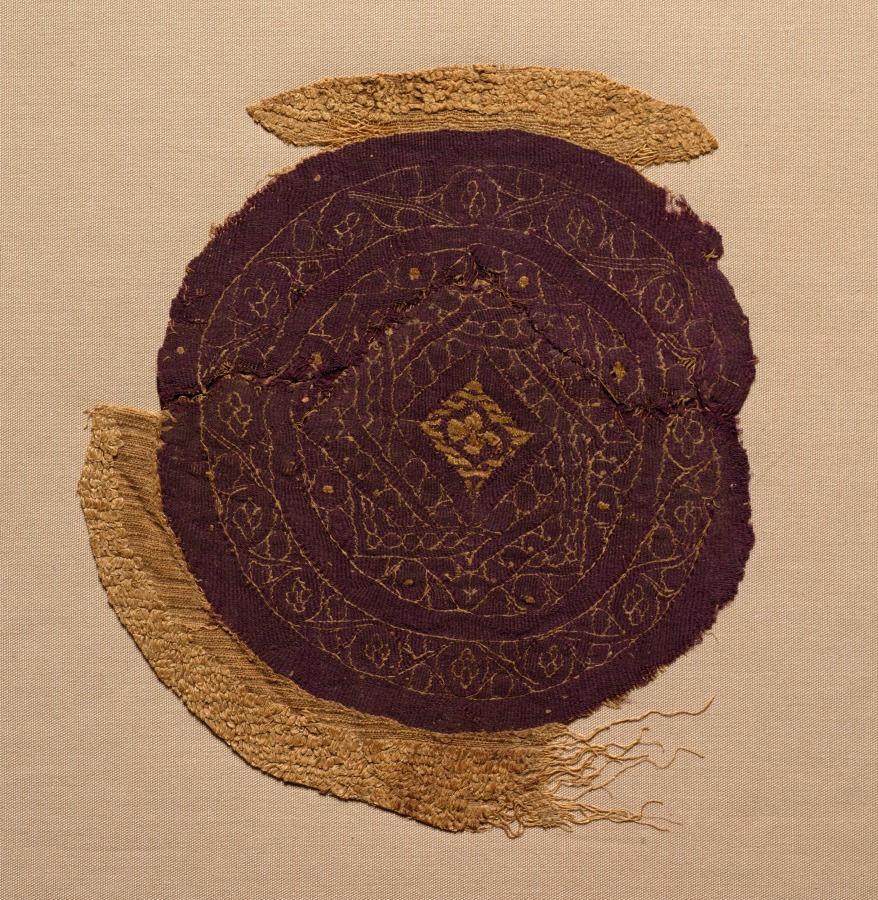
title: Fragment with Gold Foil and Apotropaic Interlacing Knots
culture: Egypt, Byzantine period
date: 300s–400s CE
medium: undyed linen, dyed wool, and gold foil; plain weave with supplementary weft-loops, slit-tapestry weave with supplementary weft wrapping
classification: Textile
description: The rare gold foil and rich purple wool in these two fragments originally enriched a luxurious fabric. Costly gold foil wrapped around a silk core forms the central motif within a diamond, woven in tapestry weave. The surrounding interlacing knot design—achieved with three overlapping squares (in the small fragment) or interlacing squares (in the large fragment)—offered protection from danger and harm. The roundels were woven with extra, or supplementary, linen wefts wrapped on the purple ground. Linen pile loops in the ground fabric resisted abrasion in furnishing fabrics and provided insulation in tunics.